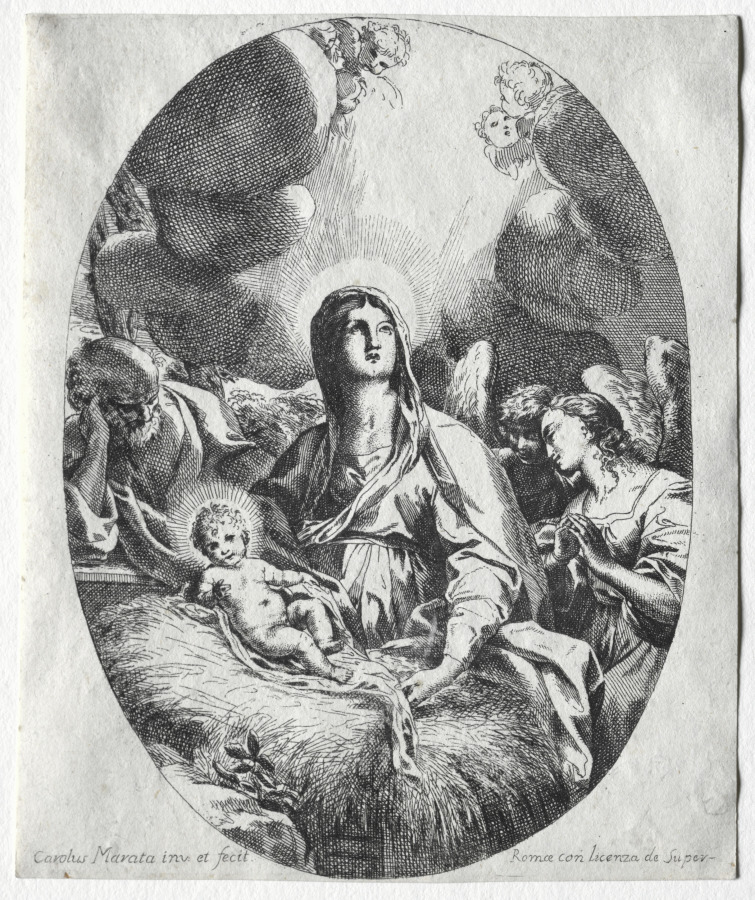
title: The Adoration of the Angels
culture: Italy, 17th century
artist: Carlo Maratti (Italian, 1625–1713)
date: c. mid-1600s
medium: etching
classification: Print